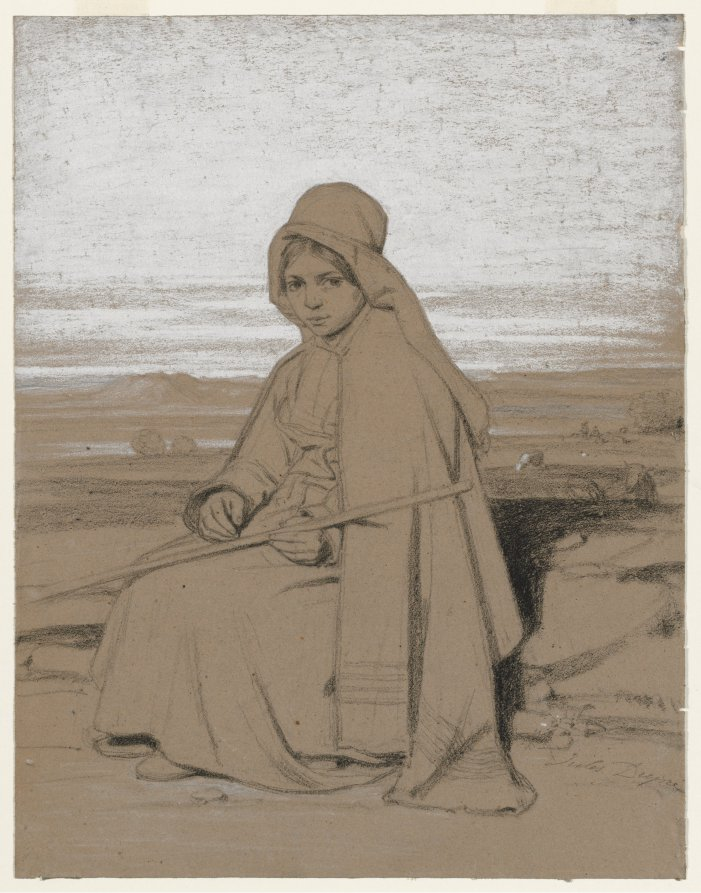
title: A Seated Shepherdess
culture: France, 19th century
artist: Jules Dupré (French, 1811–1889)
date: c. 1836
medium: black chalk with white heightening and white pastel on brown paper laid down on board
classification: Drawing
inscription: Signed, lower right, in black chalk: Jules Dupre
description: Unique for Jules Dupré, who mostly recorded landscapes, this sheet features a woman holding a crook for herding sheep. Many middle-class collectors at the time were eager for images of rural life while cities grew and factories proliferated. Cleveland’s drawing forms a pair with a similar depiction of a male shepherd, also created using wetted and burnished white pastel on earthy brown paper. It is one of numerous objects in these galleries formerly owned by Clevelander Muriel Butkin, a passionate scholar and collector of French art from the 1800s who bequeathed nearly 300 drawings to the museum.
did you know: Dupré was known for his evocative skies reflecting different atmospheric conditions.